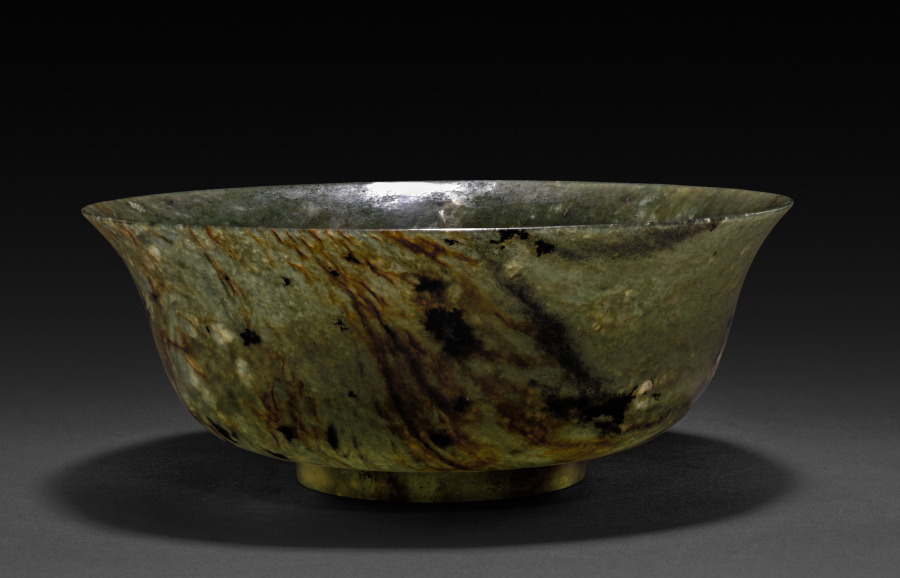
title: Pair of Bowls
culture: China, Qing dynasty (1644–1911), Qianlong reign (1736–95)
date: 1736–95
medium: spinach jade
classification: Jade